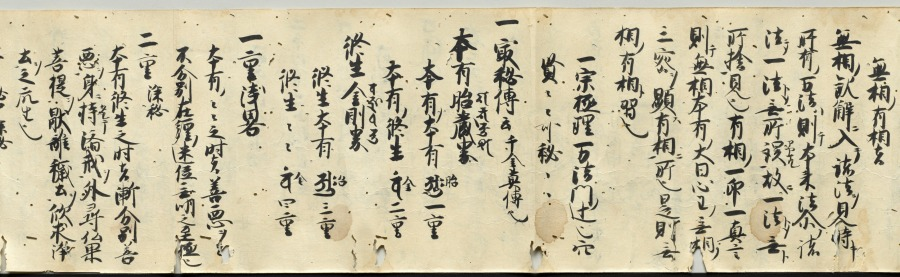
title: Scroll of Miscellaneous Notes written on a Calendar by Priest Seigen (recto)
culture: Japan, Kamakura period (1185–1333)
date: c. 1200–1231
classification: Manuscript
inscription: bears miscellaneous notes written by Priest Seigen.